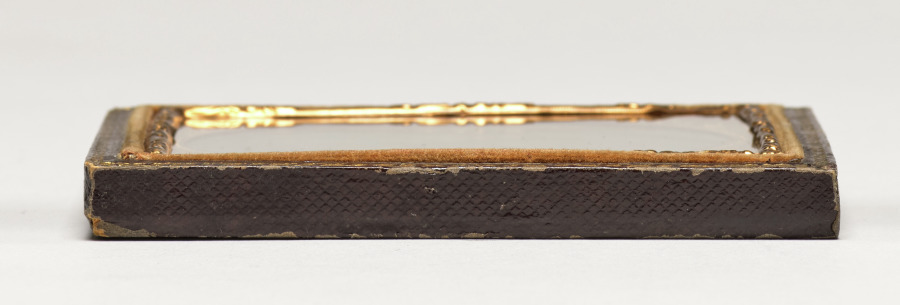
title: Mother and Child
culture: America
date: c. 1865–70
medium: ambrotype, tinted, sixth plate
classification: Photograph